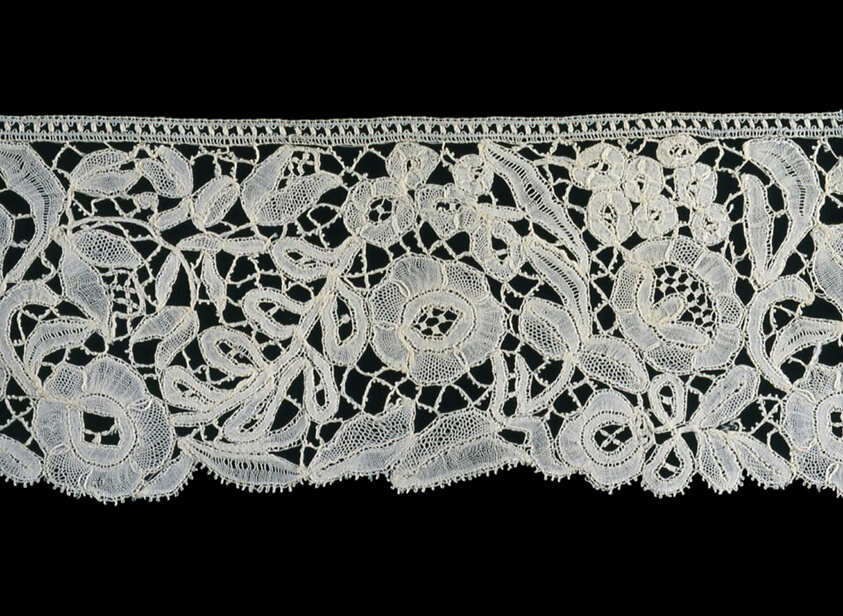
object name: Textile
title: Border (Fragment)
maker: Belgium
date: 1850/75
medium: Cotton and linen, bobbin part lace of a type known as "Duchesse de Bruges"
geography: Belgium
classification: textile; lace - bobbin; lace